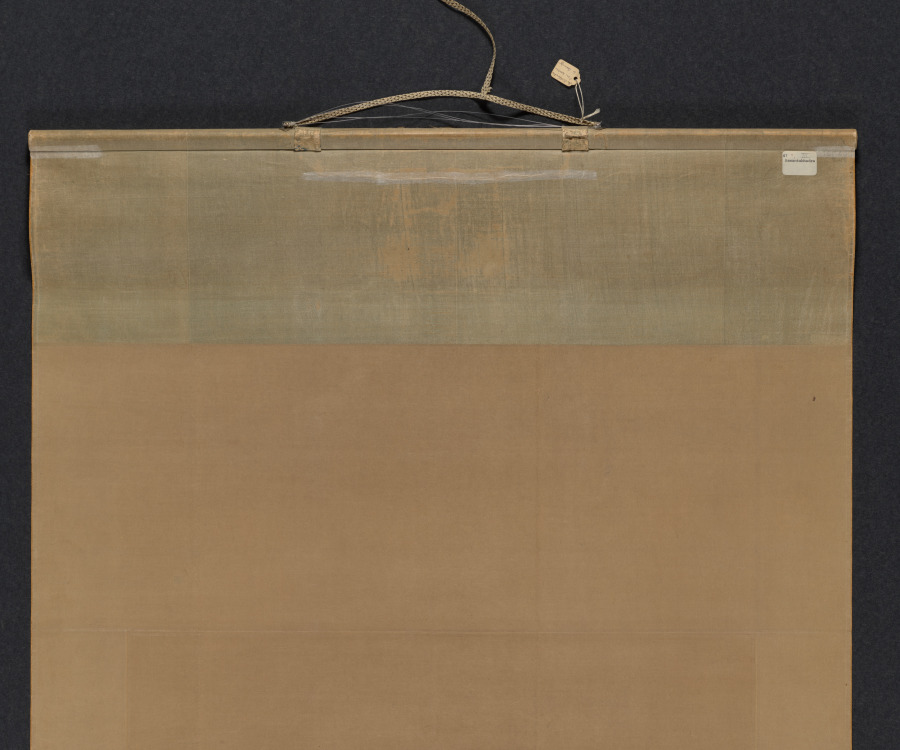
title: Samantabhadra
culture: China, Southern Song dynasty (1127-1279)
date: 1100s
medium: hanging scroll; ink and color on silk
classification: Painting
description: In the last chapter of the Lotus Sutra, one of the principal Buddhist texts, the great Bodhisattva Samantabhadra is described advancing to earth, riding on a six-tusked elephant, and proclaiming himself protector of the faithful. More frequently, he is shown with Bodhisattva Manjusri as the attendants of Shakyamuni (the historical Buddha). This scroll is probably the left panel in a triptych (group of three paintings) portraying these deities.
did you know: Samantabhadra holds a lotus with a sutra on top of the blossom.